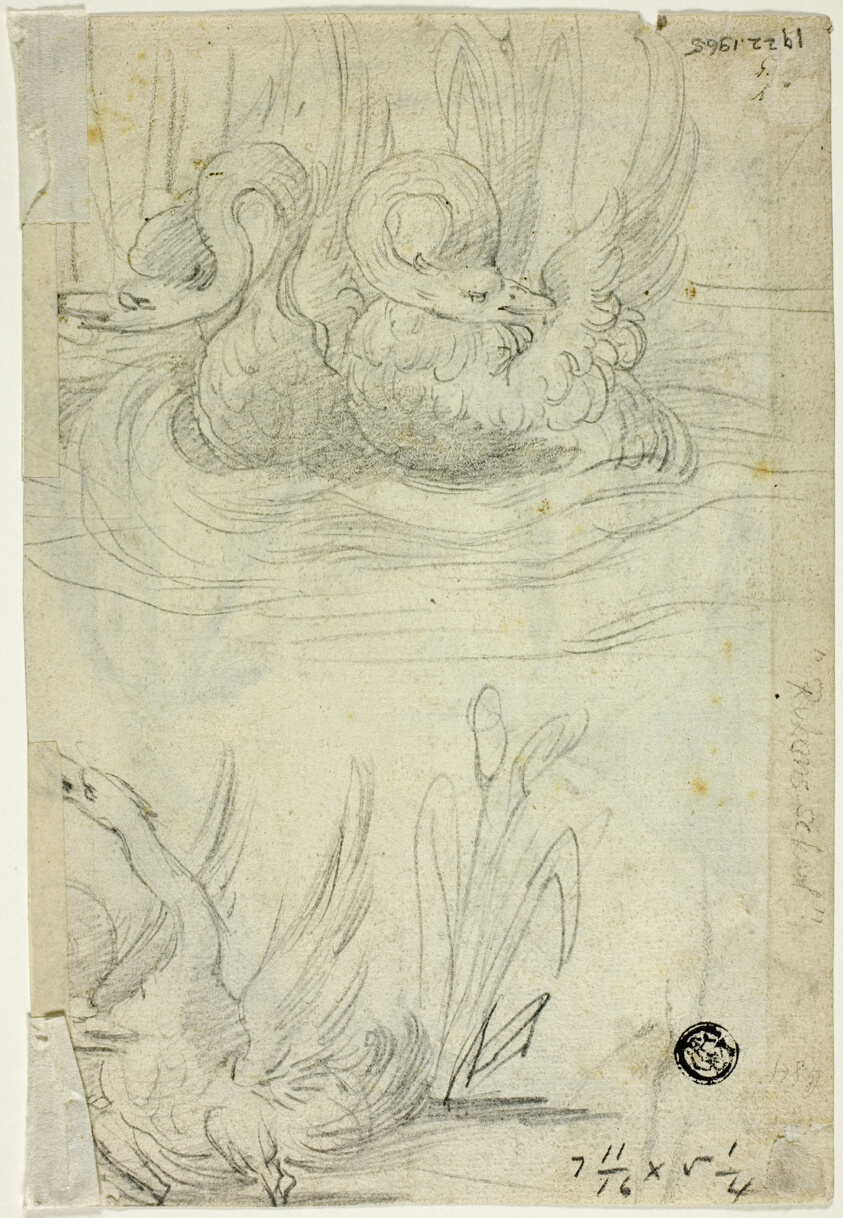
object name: Drawing and Watercolor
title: Draped with Hooded Figure (recto); Two Sketches of Swans in Water (verso)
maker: Possibly Anthony van Dyck (Flemish, 1599-1641); or the school of Peter Paul Rubens (Flemish, 1577-1640)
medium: Black chalk (recto and verso) on ivory laid paper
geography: Flanders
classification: drawings (visual works); prints and drawing